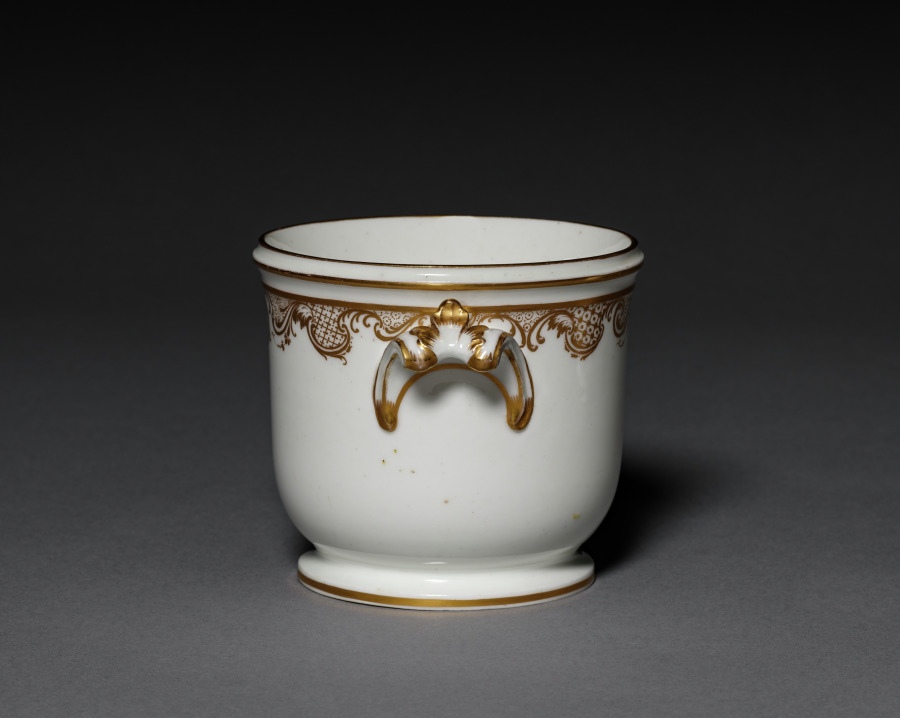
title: Flower Pot (1 of 2)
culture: France, Vincennes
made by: Vincennes Porcelain Factory (France, 1740–56)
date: 1745–53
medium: soft-paste porcelain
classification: Ceramic